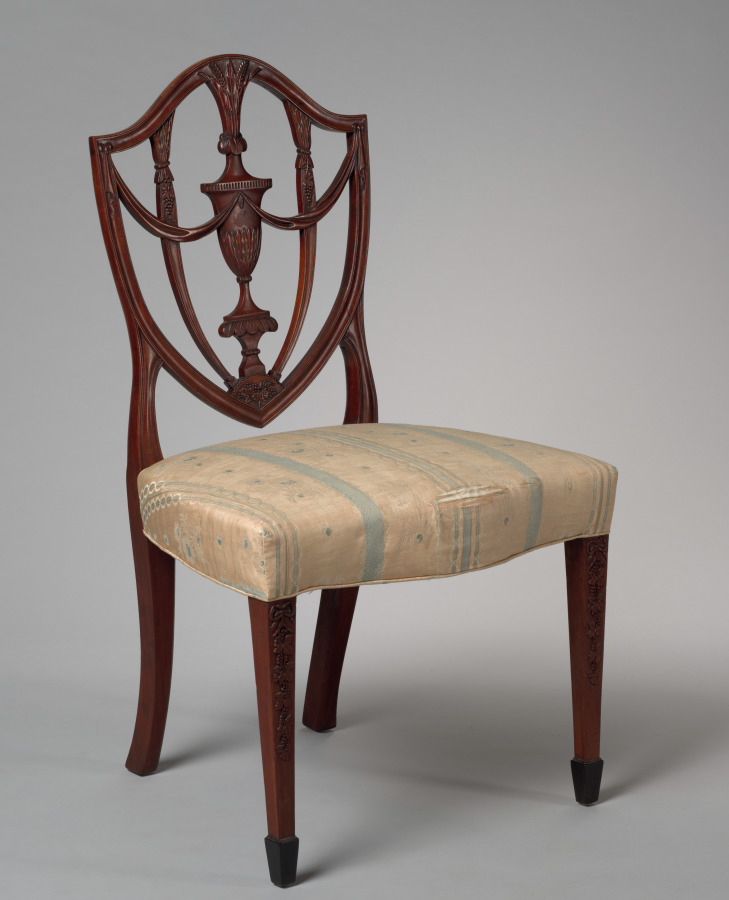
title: Chair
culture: America, Salem, early 19th Century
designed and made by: attributed to Samuel McIntire (American, 1757–1811)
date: c. 1800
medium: mahogany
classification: Furniture and woodwork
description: This chair exemplifies the neoclassic style in America. Design books published by British cabinetmakers transmitted the style to the New World. Indeed, Samuel McIntire found inspiration for this chair in Plate 2 from the 1794 edition of George Hepplewhite's Cabinetmaker and Upholsterer's Guide. The McIntire chair's shield-shaped back, however, is pointed rather than rounded, and the front legs, enriched with carved grapevines, have tapered "spade" feet with ebony applied. McIntire's carving skill brought him great success in Salem, a town half the size of Boston, but where some of the finest furniture of the period was made. This chair comes from a set owned by the Derby family, one of the most prominent in Salem.